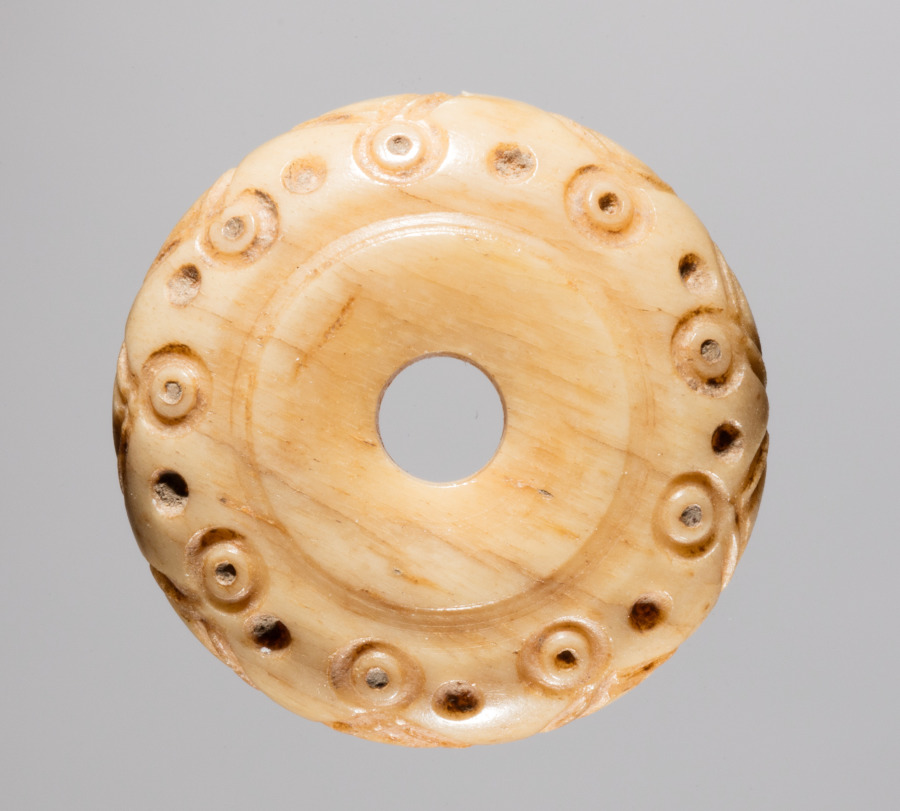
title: Spindle Whorl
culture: Iran, early Islamic period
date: 700s - 900s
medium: bone, incised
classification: Spindle Whorl